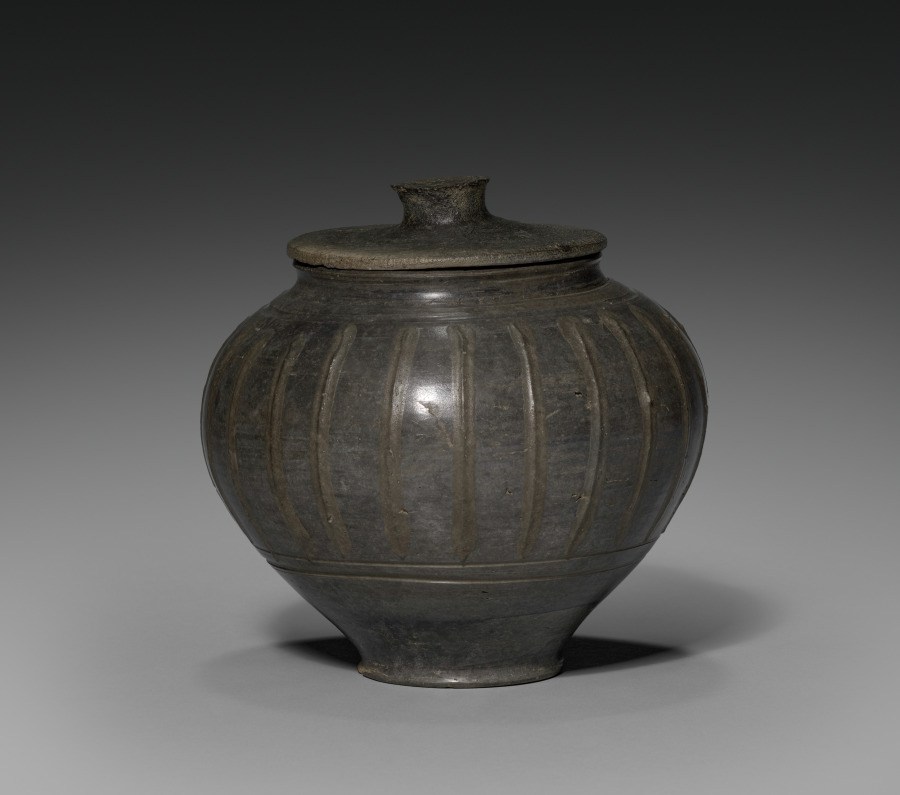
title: Pot with Cover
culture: Rhenish (Cologne), Gallo-Roman, 2nd century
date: 100–200 CE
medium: tan ware with gray and some brown burnished slip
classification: Ceramic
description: This elegant pot with its matching lid was made using a potter’s wheel, evident from the subtle horizontal rings that are visible across the belly of the vessel. The vertical ribs were added after the pot was removed from the wheel, using a thick clay paste. The vessel’s lid suggests that it was used for storage.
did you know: The shiny surface of this pot was made using a technique called burnishing, performed by polishing a surface with a hard, smooth object.